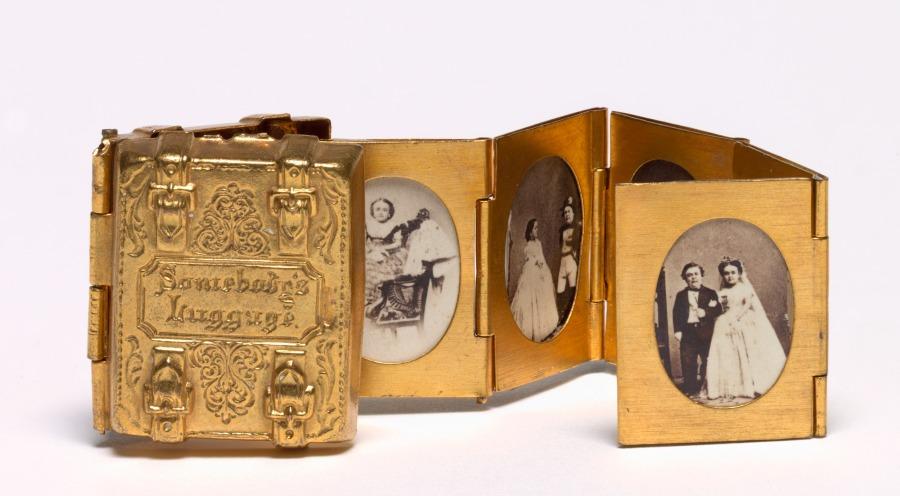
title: Somebody's Luggage (Miniature Wedding Album of Tom Thumb and Lavinia Warren)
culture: America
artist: Mathew Brady (American, 1823–1896)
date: c. 1863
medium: brass photographic locket with 12 miniature albumen prints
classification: Jewelry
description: This deluxe commercial souvenir commemorates the marriage of “General” Tom Thumb (Charles Sherwood Stratton) and Lavinia Warren, performers at P. T. Barnum’s American Museum. Thumb was such a celebrity that the wedding pushed the Civil War off newspapers’ front pages for days. Cartes-de-visite of the wedding sold in the thousands; Brady even licensed the image to lithographers and other photographers. In one image, Lavinia holds a baby who was borrowed for the photo shoot to suggest her domestic skills. The locket is shaped like a miniature suitcase bearing the words “Somebody’s Luggage,” the title of an 1862 story by Charles Dickens.